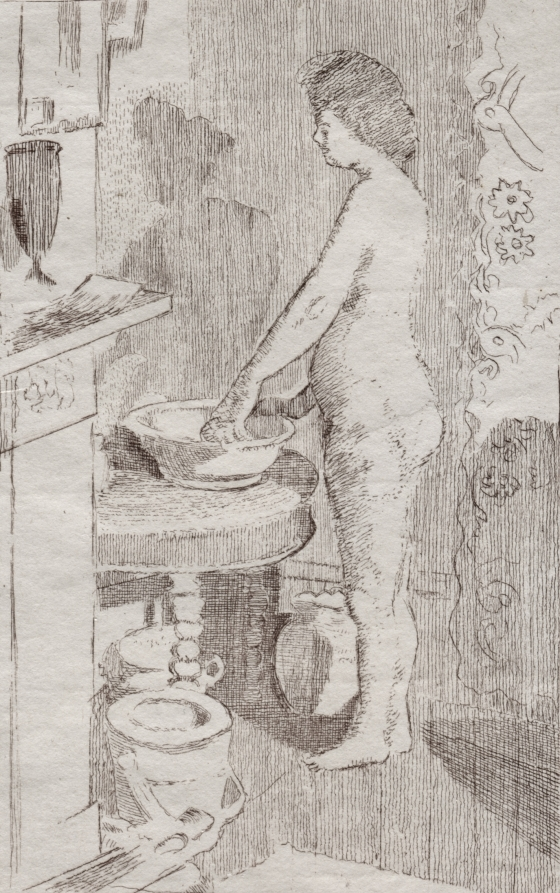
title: Sally: The Small Plate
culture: England, 20th century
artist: Walter Sickert (British, 1860–1942)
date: c. 1911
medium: etching printed in brown ink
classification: Print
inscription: annotated in graphite along the lower margin and upper right corner